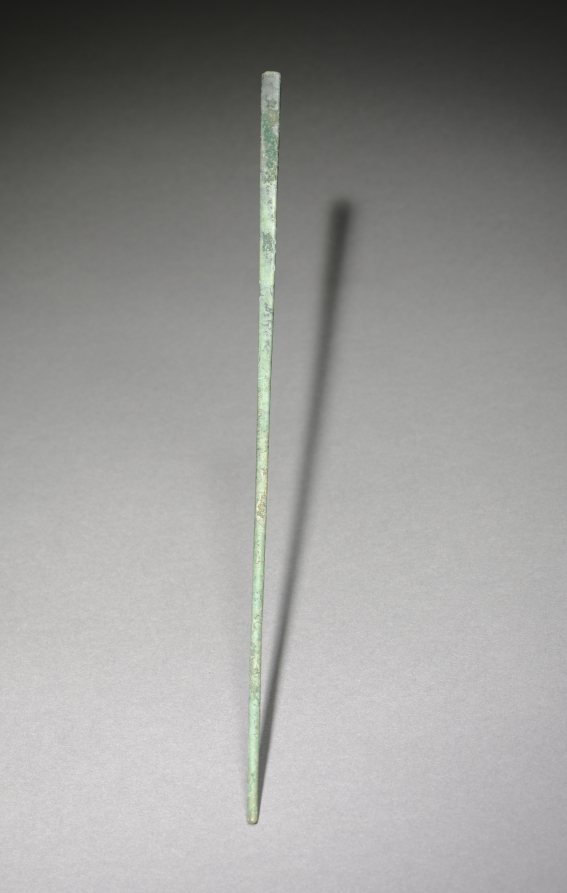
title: Chopstick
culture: Korea, Goryeo dynasty (918–1392)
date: 918–1392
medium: bronze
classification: Metalwork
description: In Korea, chopsticks made of metal such as brass, silver, and gold were excavated from ancient tombs and ruins dated to the 6th century at the earliest. Burial goods often include utilitarian objects such as table wares and utensils because the dead were believed to need them in the afterlife.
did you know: In contrast to the Chinese and Japanese, Koreans still prefer metal chopsticks (stainless steel and brass) to wooden ones.